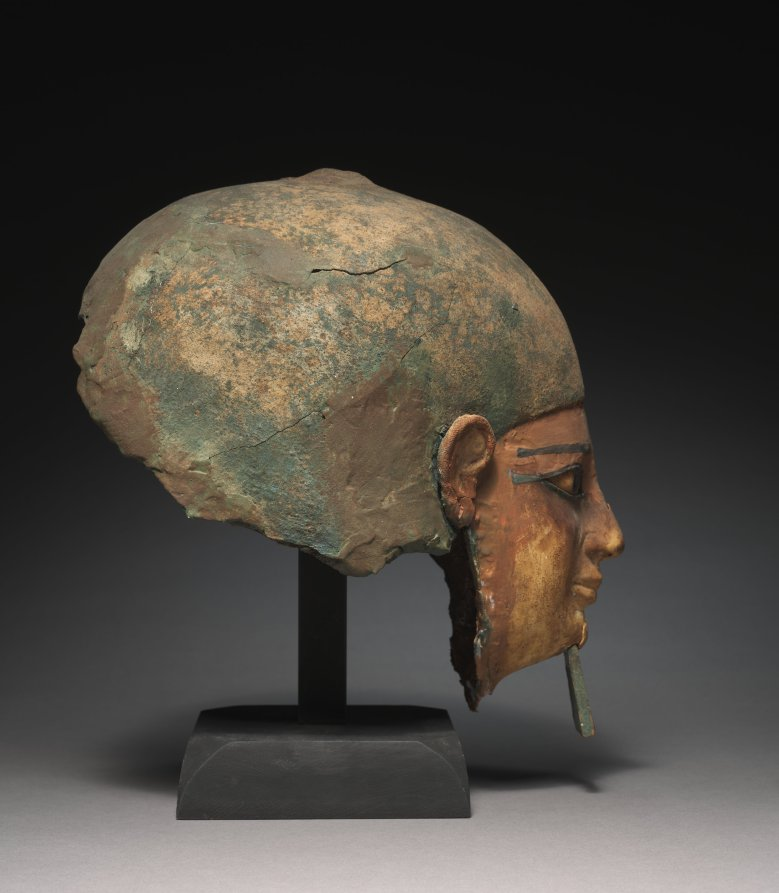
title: Mummy Mask of Senbi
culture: Egypt, Meir, Middle Kingdom (2040–1648 BCE), Dynasty 12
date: 1980–1801 BCE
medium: cartonage, wood, limestone, obsidian, paint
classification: Funerary Equipment